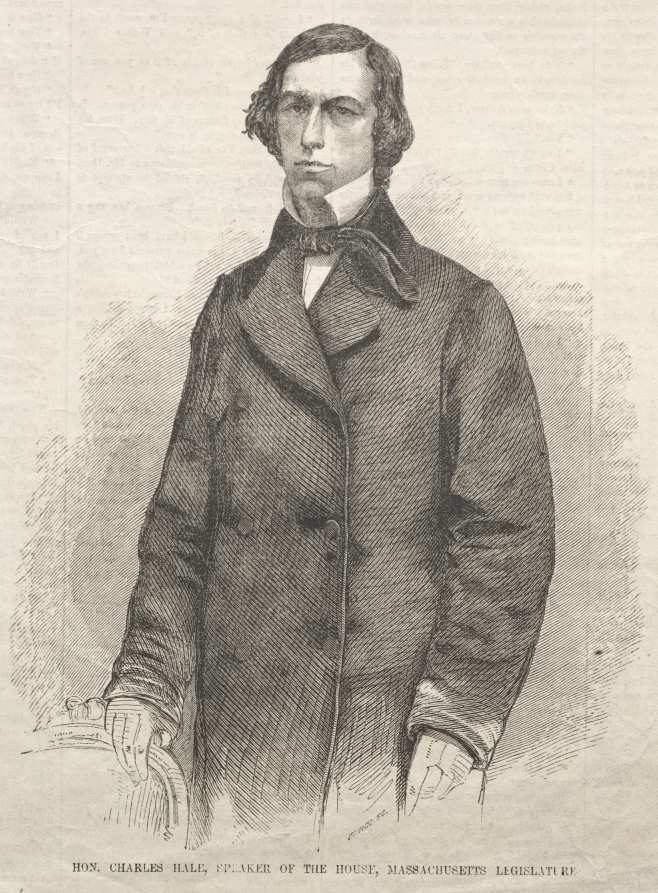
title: Hon. Charles Hale, Speaker of the House, Massachusetts Legislature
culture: America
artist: Winslow Homer (American, 1836–1910)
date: 1859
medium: wood engraving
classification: Print